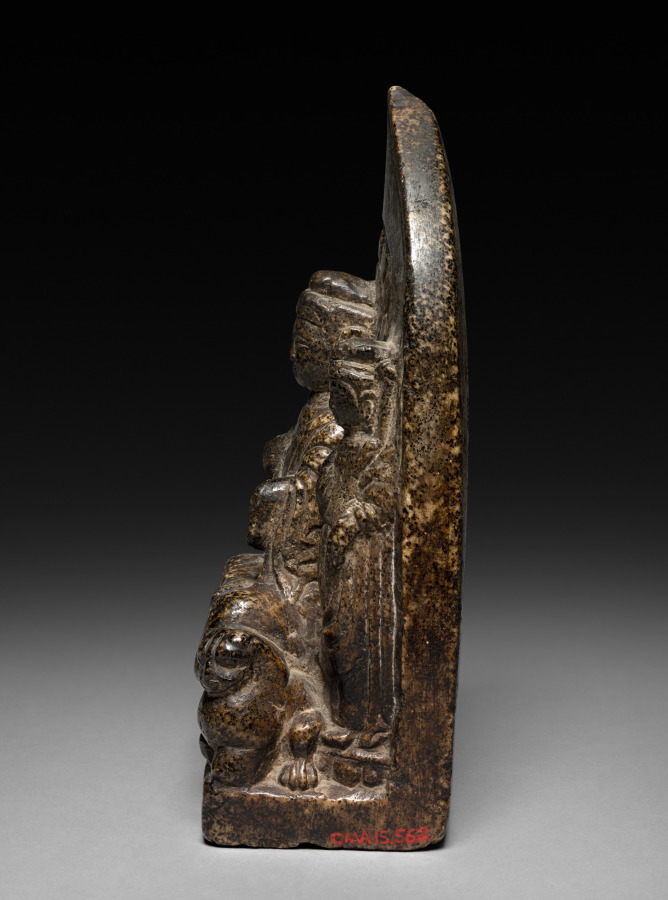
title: Buddha Triad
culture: China, Northern Dynasties period (386–581 CE), Northern Zhou (557-581)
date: 568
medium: stone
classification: Sculpture